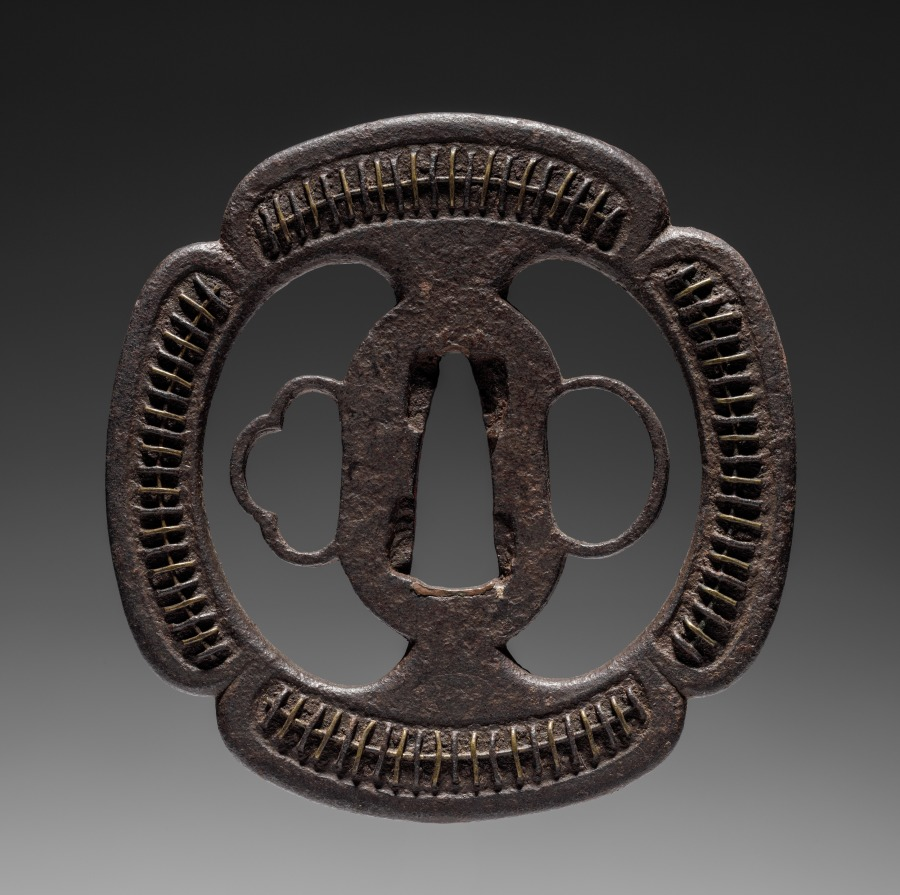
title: Sword Guard (Tsuba)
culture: Japan, possibly Edo period (1615-1868)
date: c. 1615–1868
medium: iron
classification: Arms and Armor